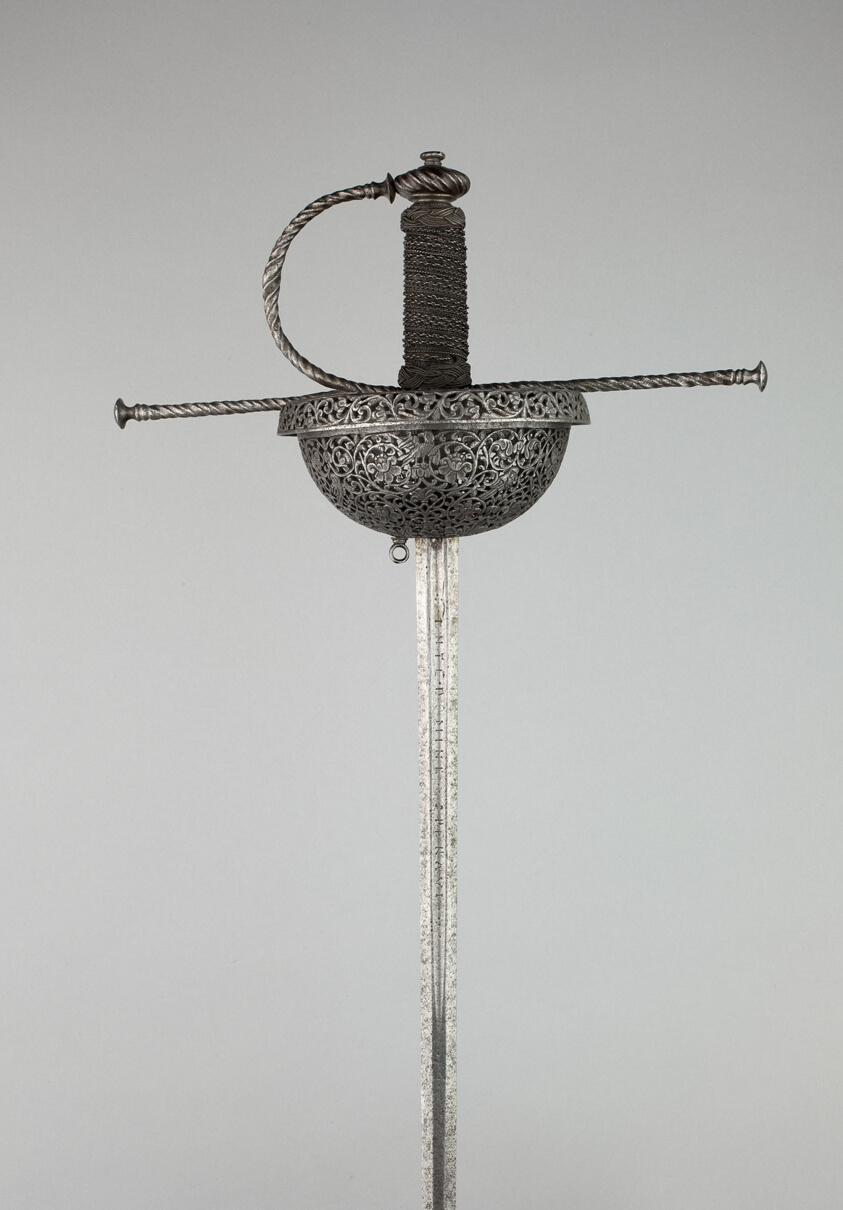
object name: Arms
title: Cup-Hilted Rapier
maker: Italian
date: c. 1650/70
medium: Steel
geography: Italy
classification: edged weapon-sword; arms; arms and armor